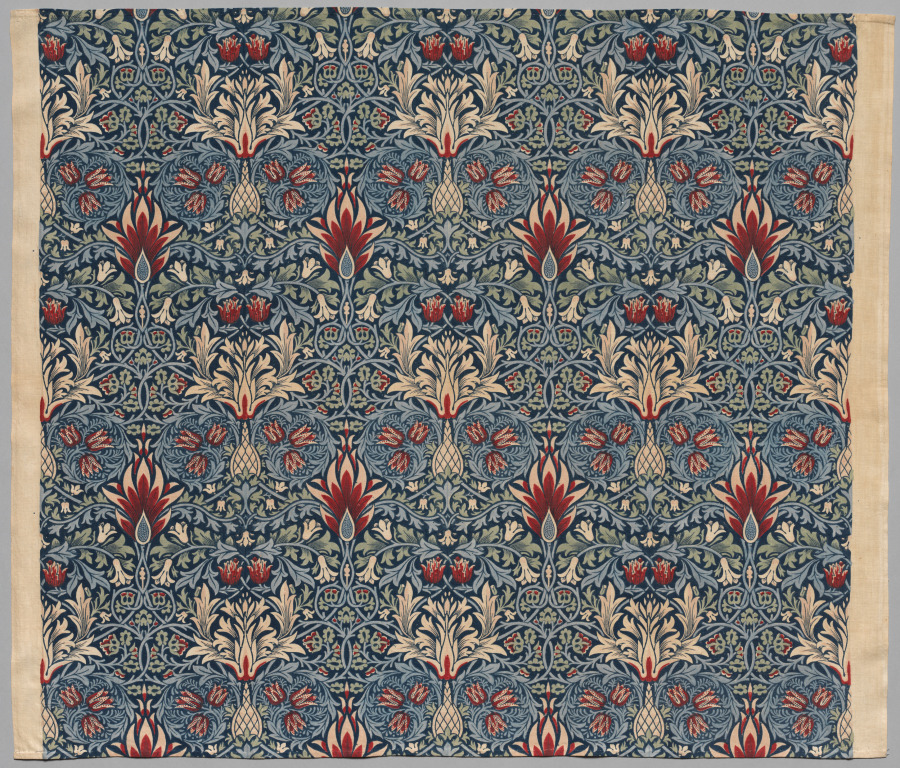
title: Snakeshead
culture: England, Walthamstow, Early 20th century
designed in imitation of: William Morris (British, 1834–1896)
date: Early 20th century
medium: plain weave cotton, printed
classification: Textile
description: When Morris designed Snakeshead in 1877, Indian silks were in style and widely imported from British India. This design stands out for its diminutive motifs and the strong red and black colors, which were fashionable only for a short time before paler hues regained favor with clients. While its color scheme suggests distant lands with warmer climates, the pattern showcases one of Morris’s favorite flowers: the fritillary, a wildflower that he remembered growing in the meadows near Oxford.